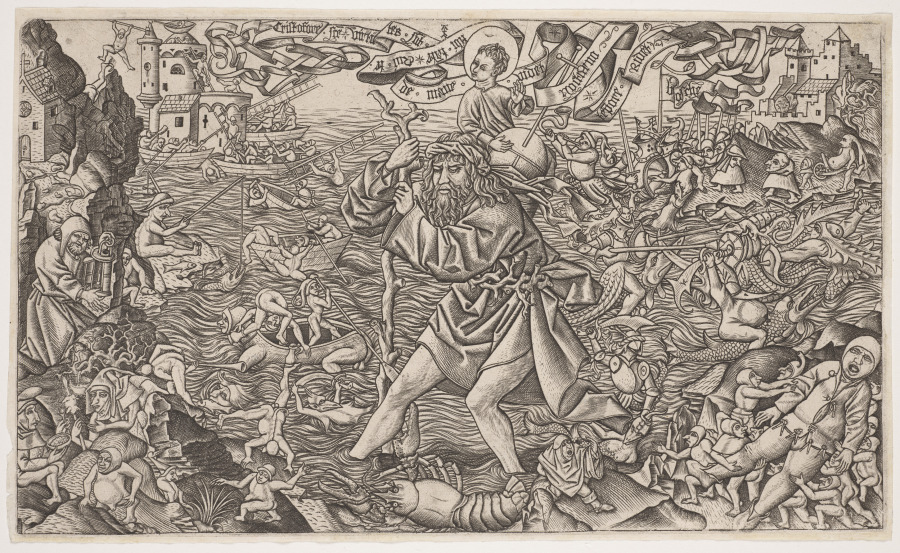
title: St. Christopher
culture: Netherlands, 15th century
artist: Alart du Hameel (Netherlandish, c. 1449–c.1507)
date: 1478–1506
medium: engraving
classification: Print